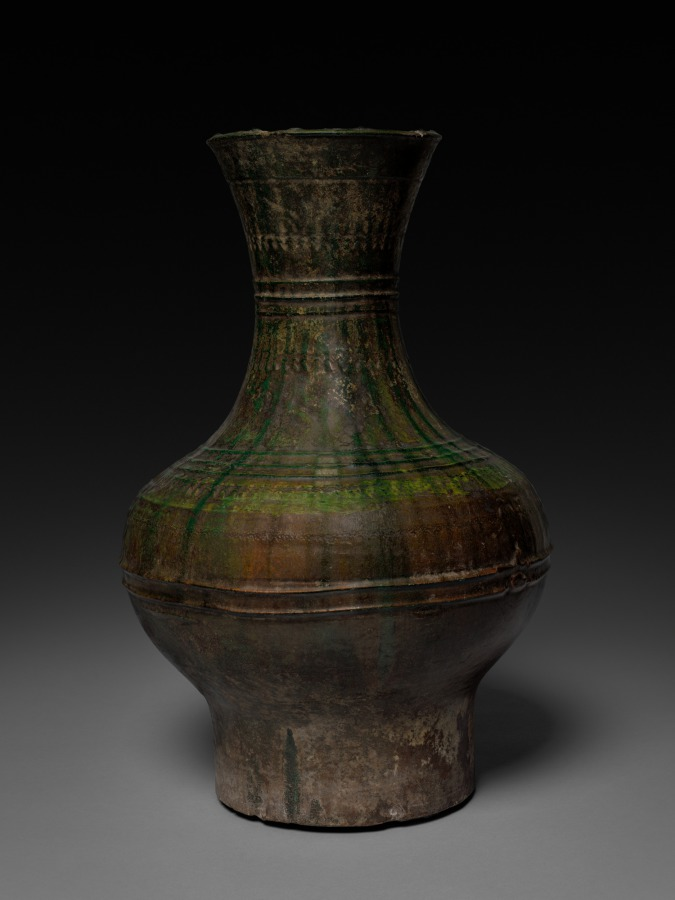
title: Jar (Hu)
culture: China, Han dynasty (202 BCE–220 CE)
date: 206 BCE–220 CE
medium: earthenware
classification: Ceramic